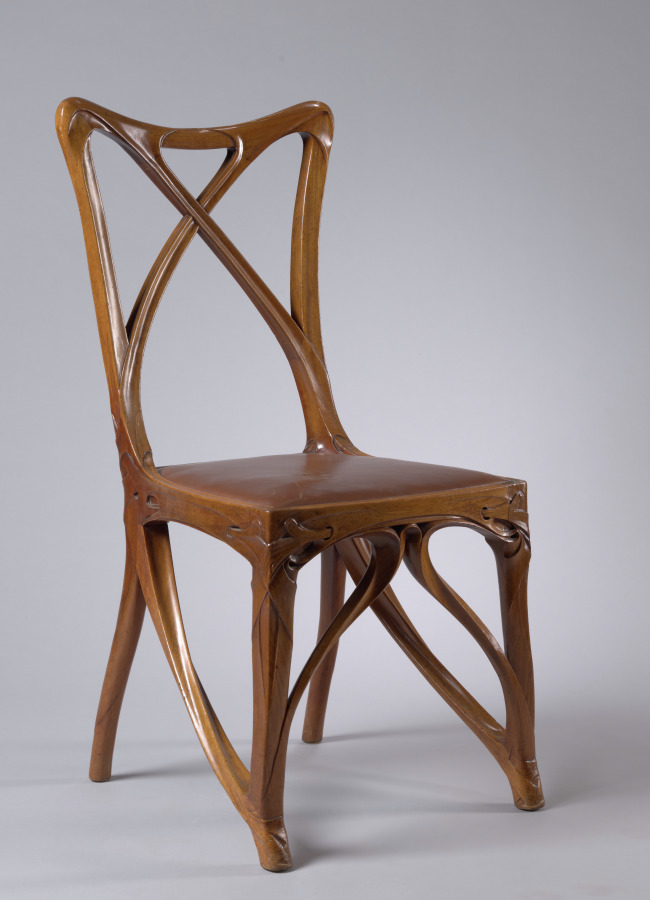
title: Side Chair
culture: France, Paris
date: c. 1900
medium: mahogany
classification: Furniture and woodwork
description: During the 1890s a new style emerged that reflected naturalistic and symbolic motifs found in Japanese and other Asian design. This movement rejected the historicism that had dominated architecture and design during the previous decades and took hold across Europe and America too. In France the style was known as "Art Nouveau," after the name of the gallery belonging to its chief proponent Siegfried Bing, the Maison de L'Art Nouveau (House of the New Art). This side chair typifies Art Nouveau style with its curving lines that seamlessly flow from one to another. This abstract use of curvilinear lines to create form and decoration was one of the major motifs favored by art nouveau designers to evoke naturalistic or organic design. Art Nouveau reached its apex at the 1900 world's fair in Paris, which was intended to herald the new century with a new style of art. However, critics and consumers alike soon rejected Art Nouveau as too sentimental in favor of newer motifs and styles as the moment passed. By 1905 it was all but forgotten.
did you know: This chair may have been designed by Parisian cabinetmaker Eugène Gaillard, who created a very similar design for the pavilion of Siegfried Bing at the 1900 world's fair in Paris.